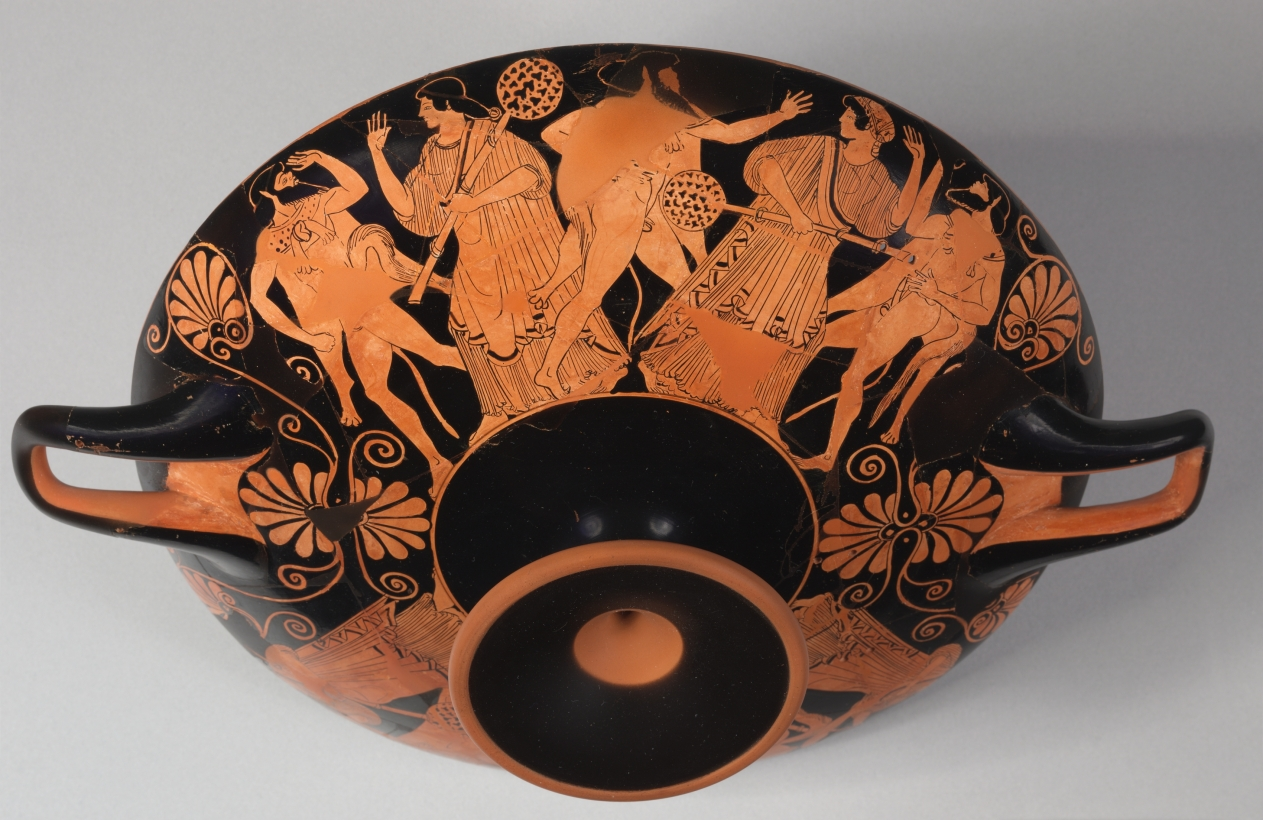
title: Red-Figure Kylix (Drinking Cup): Dionysos and Satyr (I); Satyrs and Maenads (A, B)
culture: Greece, Athens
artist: attributed to Douris (Greek, Attic, active c. 500–470 BCE)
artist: or Painter of London E 55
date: c. 480 BCE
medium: ceramic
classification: Ceramic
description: Reconstructed from 72 fragments, this cup has been repaired several times, indicating its enduring value to owners. Pairs of holes straddling cracks once held ancient wire or clamp repairs. Numerous incomplete holes may signify recent interventions. Early modern efforts to hide cracks and certain features of the satyrs that could have offended sensibilities of the time also masked the original artistry of its painting. So, for many years the cup languished in storage. Cleaning and reconstruction in 1952–53 revealed enough to allow attribution to a respected vase painter, Douris, reviving the cup’s reputation. More recently, a different attribution has been suggested, and a new conservation campaign replaced ancient parts from a different cup with modern reconstructions more like those lost.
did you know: In the tondo, a dancing satyr approaches the wine god Dionysos, who holds a kantharos and grapevine.